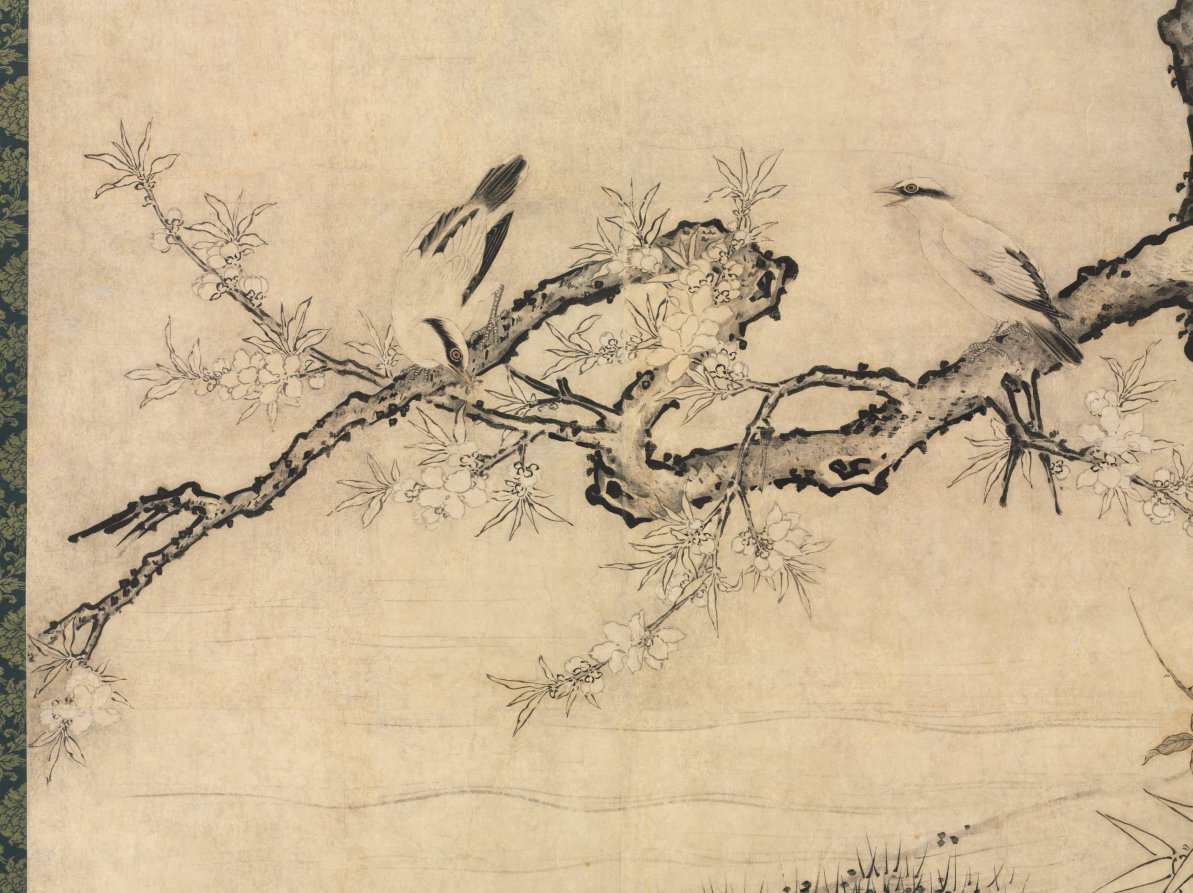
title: Flowers and Birds in a Spring Landscape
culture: Japan, Muromachi period (1392–1573)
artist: attributed to Kano Motonobu (Japanese, c. 1476–1559)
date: 1500s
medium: One of a set of sliding door panels mounted as hanging scrolls; ink and color on paper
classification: Painting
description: These four paintings originally decorated sliding doors that partitioned the interiors of Japanese buildings. Painters from the Kano school, named after the artist Kano Motonobu (1476–1559), were major forces in the production of screens and architectural interiors in Kyoto. When he headed the workshop, his work was prized by the upper strata of society. Kano is credited with combining the subtlety of Chinese black ink painting, as seen in the rocks and hills, with the color and realism of Japanese painting, seen in the birds and flowers. Landscape scenes like this were prized by the elite of Kyoto, both for their contemplative aesthetic and their patrons’ refined taste.